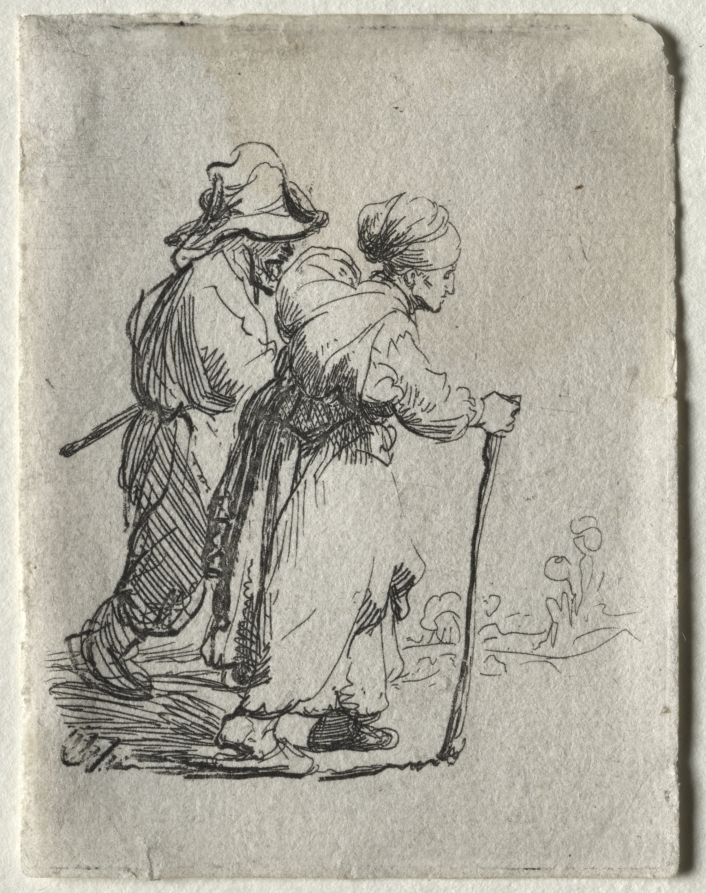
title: Two Tramps, a Man and a Woman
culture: Netherlands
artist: Rembrandt van Rijn (Dutch, 1606–1669)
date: c. 1634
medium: etching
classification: Print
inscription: VERSO, across top, in graphite: H. 116. v. g imp ; upper right, in graphite: 142; center, in graphite: 42[upsidedown] ; center, in graphite: 142; center left, in graphite: C. 9228 ; center right, in graphite: B. 144.[underlined]; lower left, in graphite: [illegible]; lower center, in graphite: 13491 ; lower right, in graphite: R469t